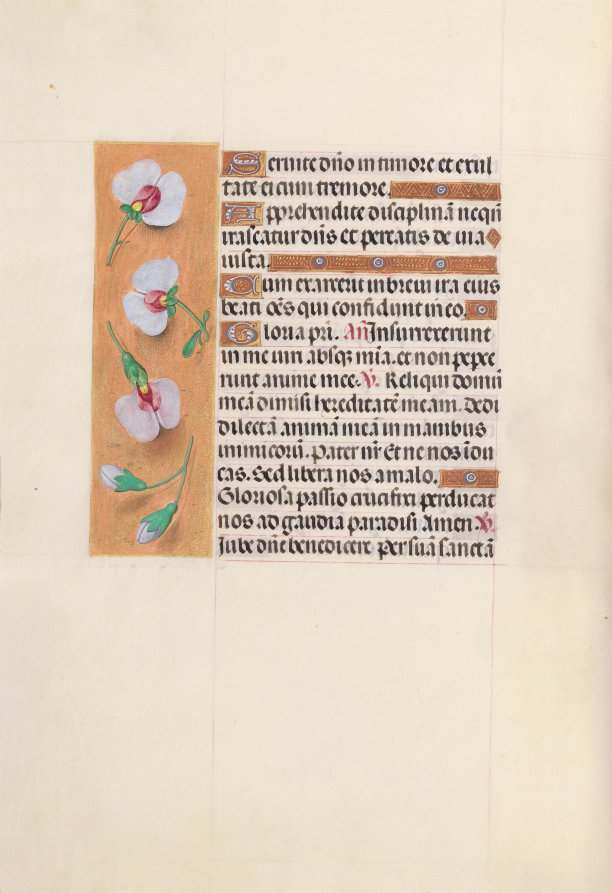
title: Hours of Queen Isabella the Catholic, Queen of Spain: Fol. 53v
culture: Flanders, Ghent and Bruges, late 15th century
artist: Master of the First Prayerbook of Maximillian (Flemish, c. 1444–1519)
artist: and Associates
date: c. 1500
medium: ink, tempera, and gold on vellum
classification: Bound Volume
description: This manuscript was illuminated by a circle of at least five highly organized manuscript painters active in the Flemish cities of Ghent and Bruges. The principal illuminator was Alexander Bening, who painted the majority of the book's miniatures. Manuscripts produced by this circle of artists are renowned for the decoration of their borders, which typically feature a rich variety of realistically-painted flowers, birds, and butterflies. This prayer book, called a book of hours, was intended not for a cleric, but for the private devotions of a lay person-in this case, Isabella the Catholic, Queen of Spain (1451-1504). Isabella's coat of arms embellishes the book's frontispiece. It is unlikely that the book was commissioned by the Queen herself; rather, she probably received it as a diplomatic gift from someone courting her patronage, perhaps Cardinal Francisco Jimenez de Cisneros. A Franciscan friar, Jimenez was dependent upon Isabella for his advancement, first to the post of Queen's confessor in 1492, and then to Archbishop of Toledo in 1495.